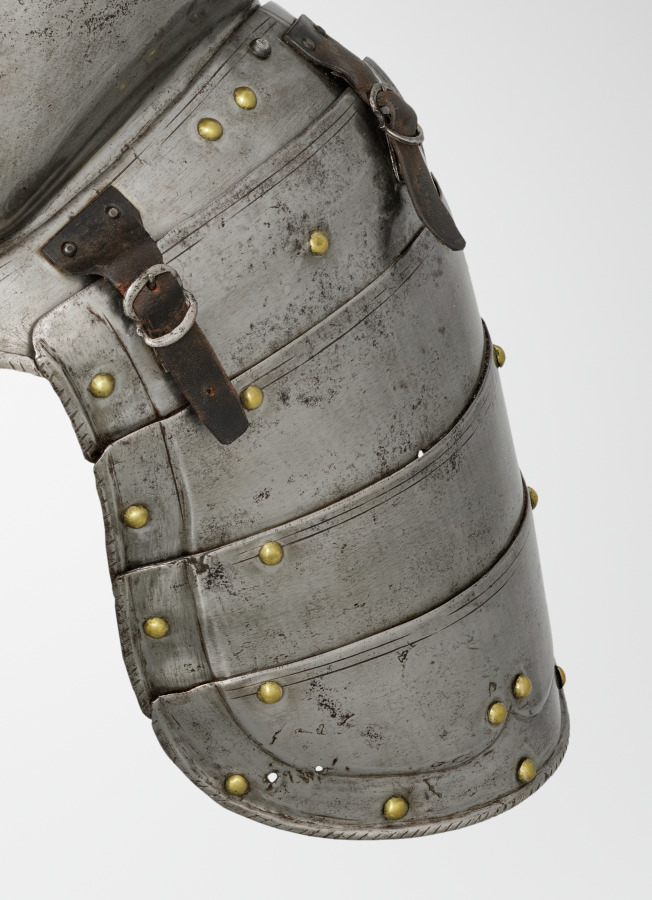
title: Tasset (proper left)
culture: South Germany, 16th century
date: c. 1560–1580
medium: steel, leather straps, brass rivets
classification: Arms and Armor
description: This armor was developed for the joust-a sporting combat between two mounted contestants. Although all of the elements of this armor date from the same period, they are not all from the same suit. This armor is thus called "composed." It also shows the asymmetry of jousting armor. The participants rode along a wall-like barrier known as a "tilt" with their left sides facing one another. Consequently, armor on that side of the body had to be thicker. Note the large plate (grandguard) over the left shoulder for extra protection. Also, the breathing holes in the helmet were placed on the right side (farthest from an opponent's lance) to avoid injuries from splinters. The bracket attached to the right breastplate is called the lance-rest, a shock-absorbing support designed to accommodate the lance when "couched" under the right armpit.